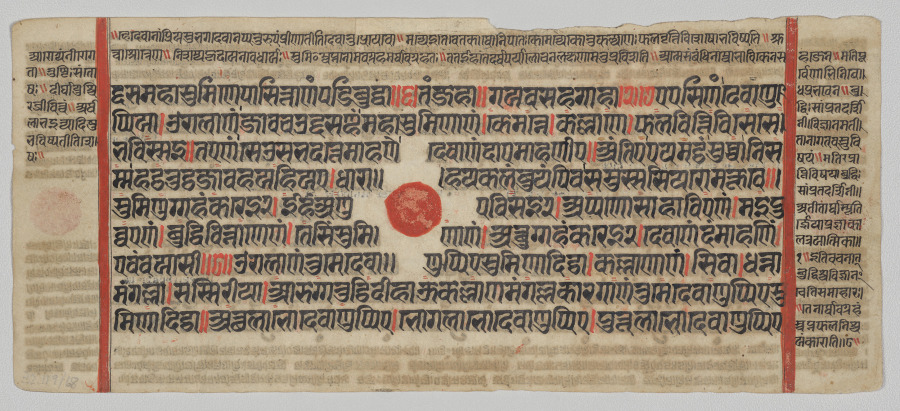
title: Text, Folio 4 (recto), from a Kalpa-sutra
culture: Western India, Gujarat, last quarter of the 15th century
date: c. 1475–1500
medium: Gum tempera, ink, and gold on paper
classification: Painting